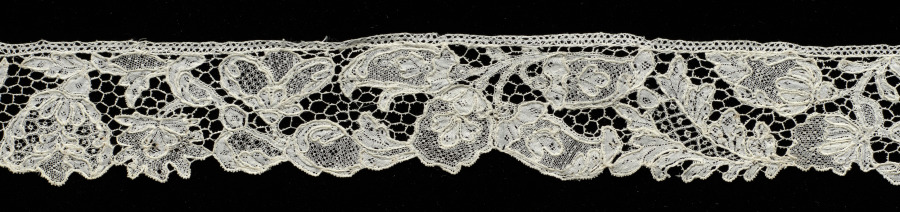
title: Lace Edging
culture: France, Alençon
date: 1700–1740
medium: Linen: needle lace (Point d'Alençon)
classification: Lace